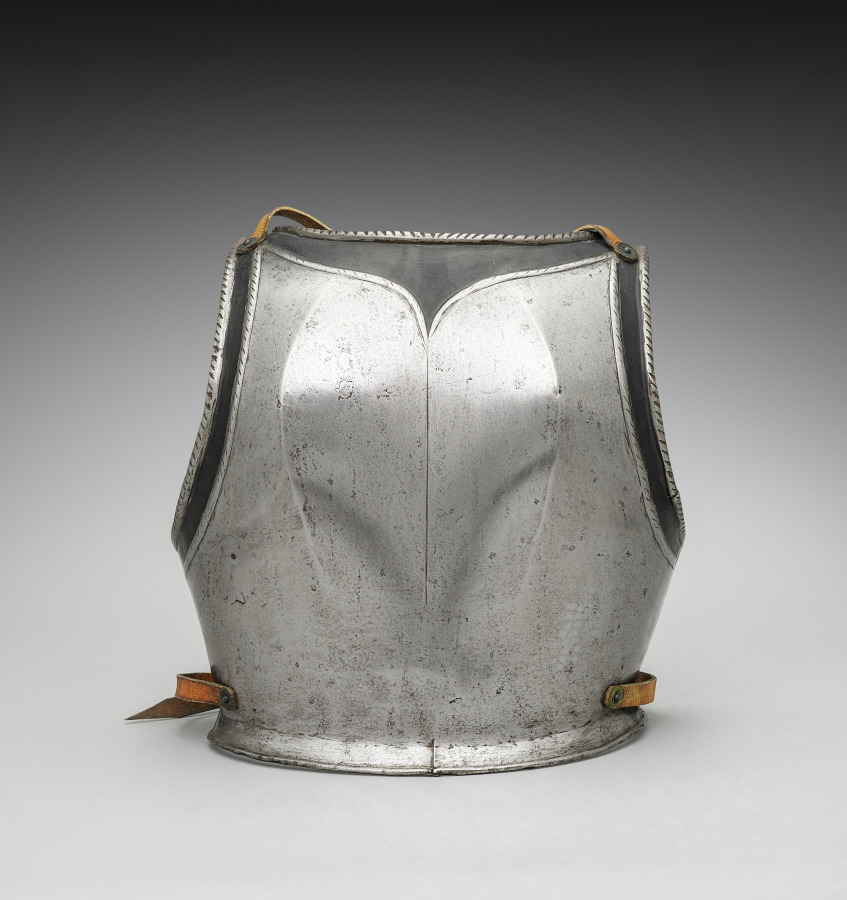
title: Backplate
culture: Germany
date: c.1550–1570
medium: iron, steel, leather and brass rivets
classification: Arms and Armor